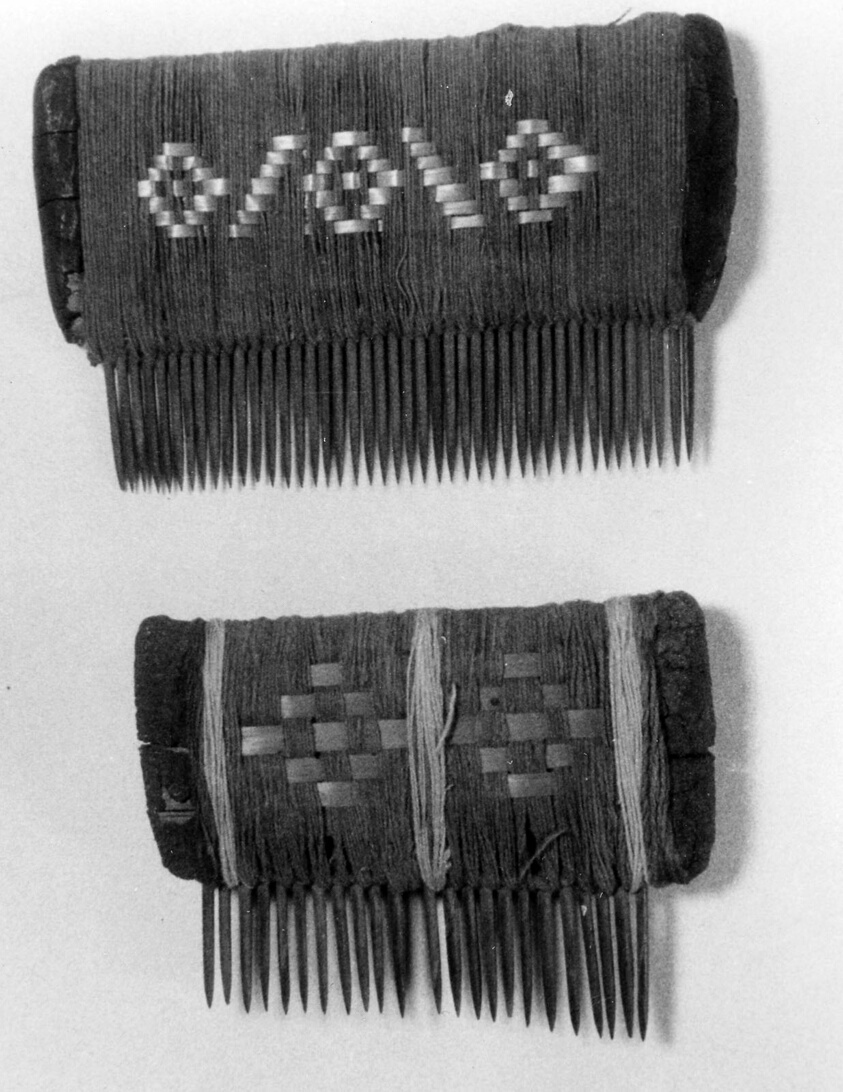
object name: Textile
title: Weaving comb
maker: Peru, Possibly central coast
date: 1000/1476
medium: Wood, cotton, split reed and resin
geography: Peru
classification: textile; textile working equipment; weaving; accessories (object genre)